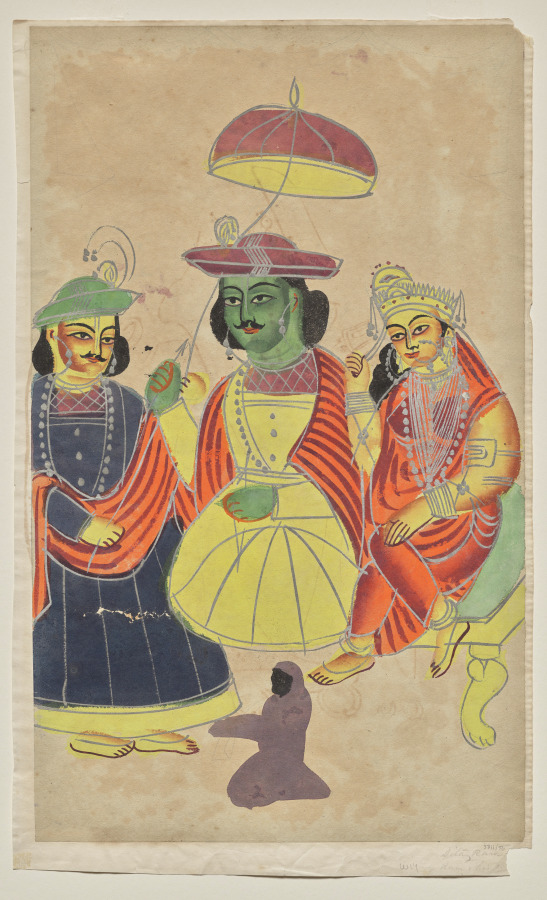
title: Rama and Sita enthroned with Lakshmana and Hanuman attending, from a Kalighat album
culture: Eastern India, Bengal, Kolkata, Kalighat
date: c. 1890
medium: Gum tempera, graphite, tin, and ink on paper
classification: Painting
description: Rama and Sita sit enthroned under a royal parasol held by Rama’s brother Lakshmana. A diminutive Hanuman kneels before them in adoration. The stunning mix of vibrant color animates the otherwise static scene. The local Indian artists who created inexpensive paintings for visitors to the temple at Kalighat were accustomed to creating rapid watercolor paintings with collapsed perspectives and flat backgrounds. Since their workshops were near the British colonial capital of Calcutta (now Kolkata), they were aware of British fashions, such as the Prince Albert mustache.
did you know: Rama wields the divine bow of Vishnu, which is why he is shown with an arrow in his right hand.